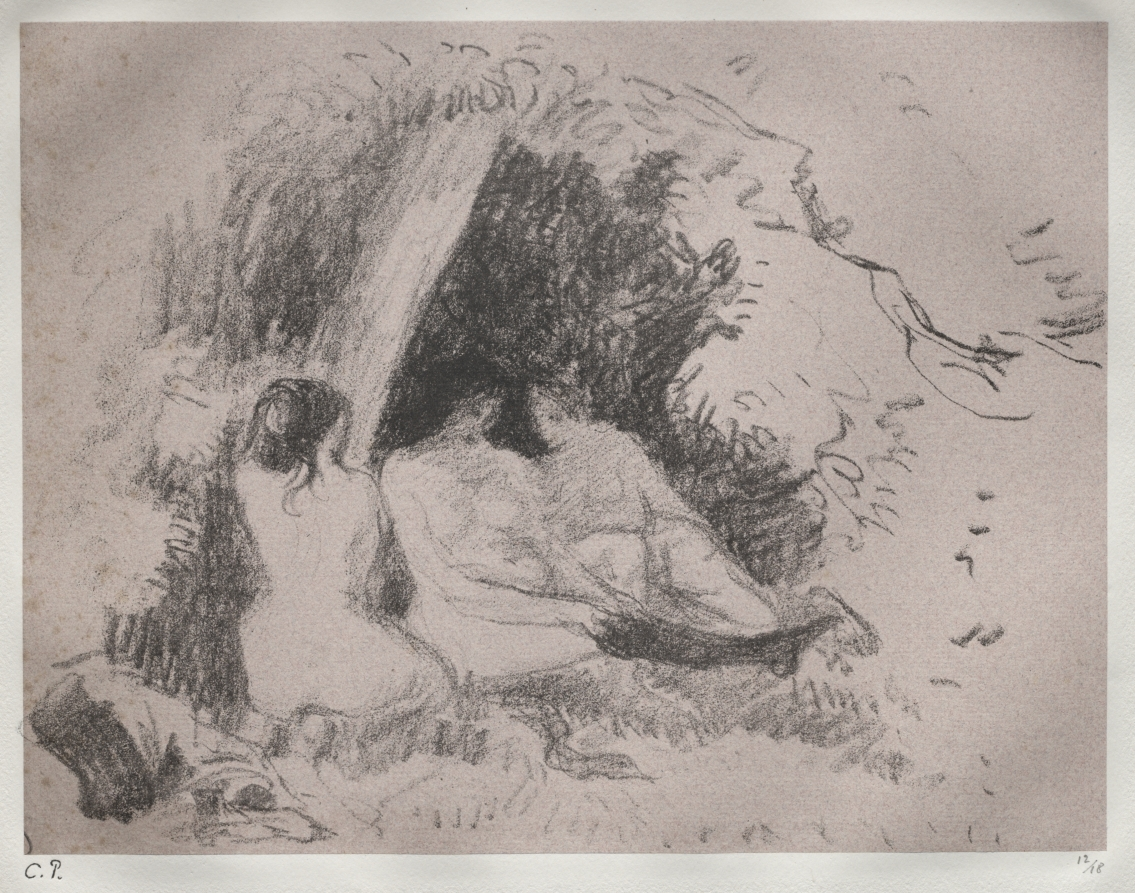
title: Nude Women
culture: France, 19th century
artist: Camille Pissarro (French, 1830–1903)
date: c. 1896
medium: lithograph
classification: Print